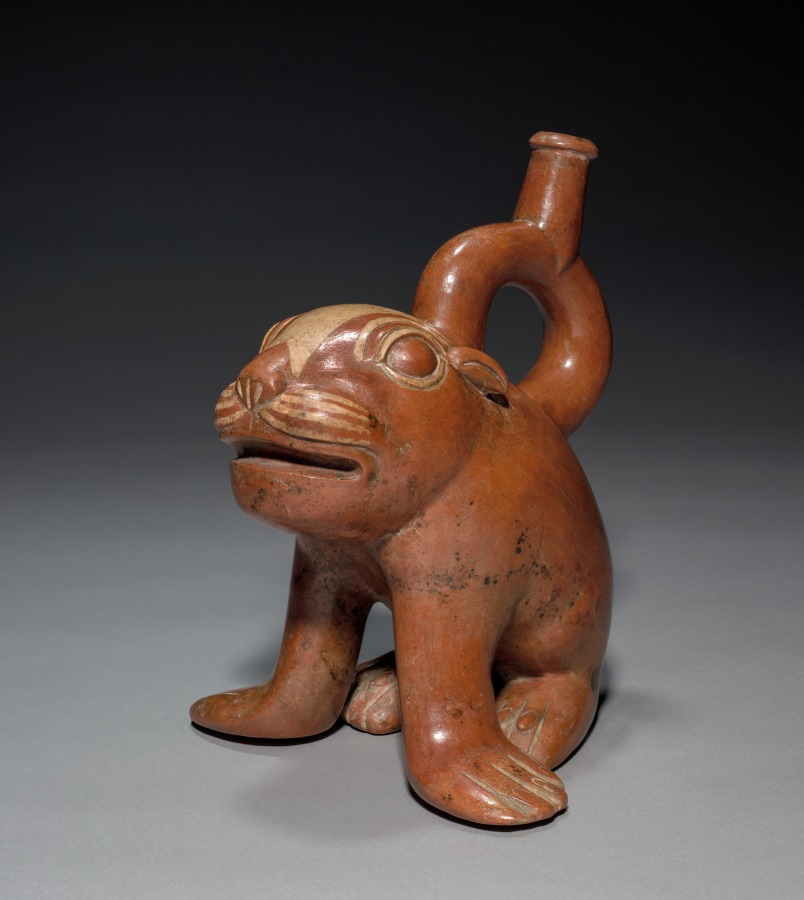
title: Sea Lion Pup Vessel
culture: Central Andes, North Coast, Moche people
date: 200–850 CE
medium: ceramic and slip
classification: Ceramic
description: Sea lions commonly appear in Moche art as effigy vessels, like this appealing pup, or in complex scenes that often show them as the targets of human hunters. They may have been prized in part for the beach pebbles found in their stomachs; modern Peruvian folk healers consider such pebbles to have powerful medicinal qualities. Also, colonial-period natives believed that sea lions carried the dead to off-shore islands, an idea that could date to Moche times.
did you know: Moche potters were skilled at producing charming images using only red and white slip.